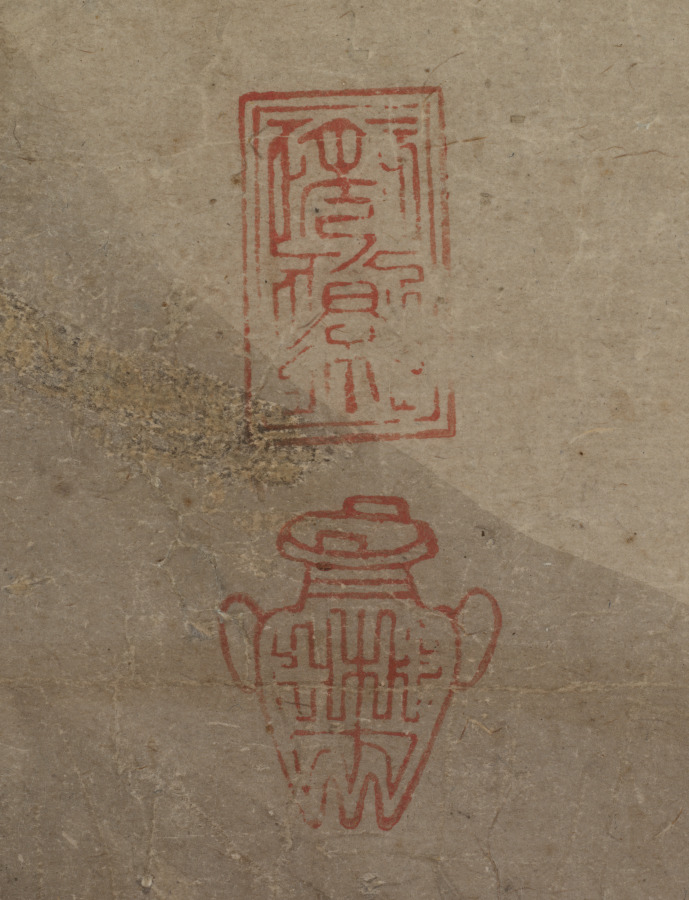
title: Su Dongpo Riding a Donkey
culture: Japan, Momoyama period (1573–1615)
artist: Reietsu (Japanese, active late 1500s to early 1600s)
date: late 1500s to early 1600s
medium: hanging scroll; ink on paper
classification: Painting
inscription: 落款 秀景 ？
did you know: Su Dongpo 蘇東坡 (1037–1101) was the leading Song dynasty poet and artist.